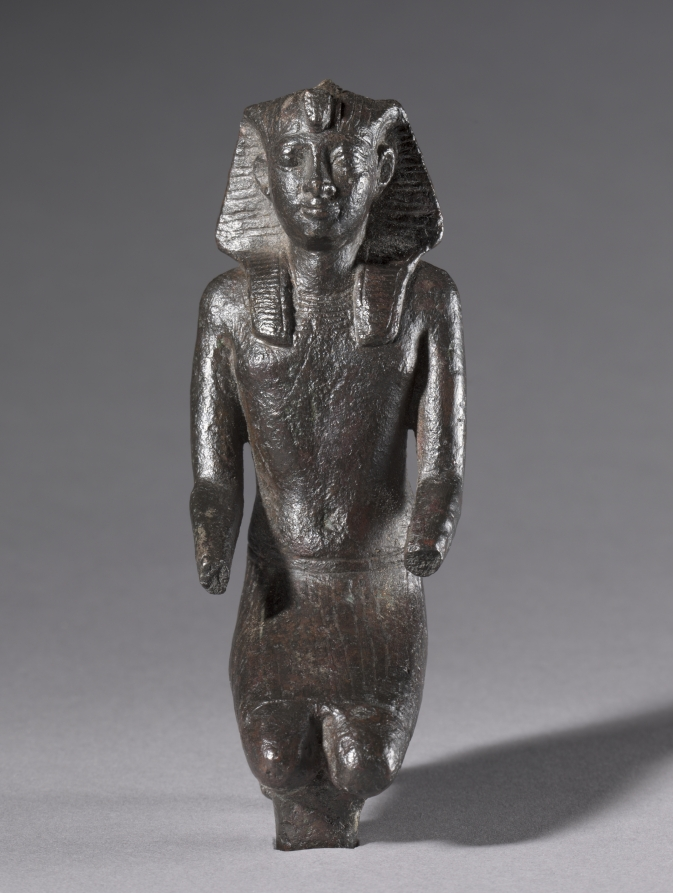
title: Statuette of Kneeling King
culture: Egypt, Greco-Roman period (332 BCE–395 CE), Ptolemaic dynasty (305–30 BCE)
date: 304–30 BCE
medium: bronze, solid cast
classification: Sculpture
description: As the chief intermediary between gods and men, the Egyptian king is often shown kneeling in adoration. Enough remains of this king's arms to indicate that his hands may have held offering jars or were extended with the palms facing each other around a naos, or shrine, containing a divine image. In Egypt, adoration required a divine recipient. This example was undoubtedly part of a group composition in which the king faced a larger figure of a god.